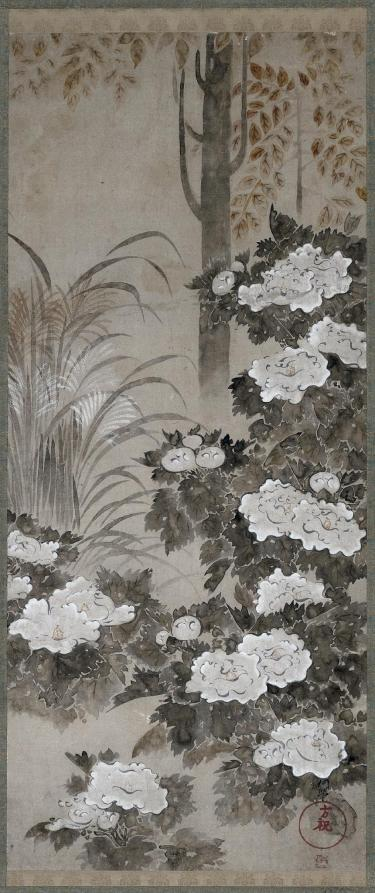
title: Peonies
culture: Japan, Edo period (1615–1868)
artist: Tatebayashi Kagei (Japanese, active mid-1700s)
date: mid 1700s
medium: hanging scroll; ink and color on paper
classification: Painting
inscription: lower right, Kagei's signature in black, a round red seal and a small square one.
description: A proliferation of white tree peonies dominates this composition. Behind them are tall, feathery-topped susuki grasses and leafy deciduous trees. Tatebayashi Kagei restricted his palette to ink with red and white color, along with sparing use of green in the peony leaves and the blades of grass. He made generous use of the “dripping-in” (tarashikomi) technique, layering pooled ink and color, in the peony leaves. The areas left in reserve create the impression of insect-eaten or late season foliage.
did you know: In 1738, Kagei received a copy made by Ogata Kōrin of a fan painting by Tawaraya Sōtatsu from Kōrin's brother Ogata Kenzan, so some think he trained with Kenzan in Edo (present-day Tokyo).